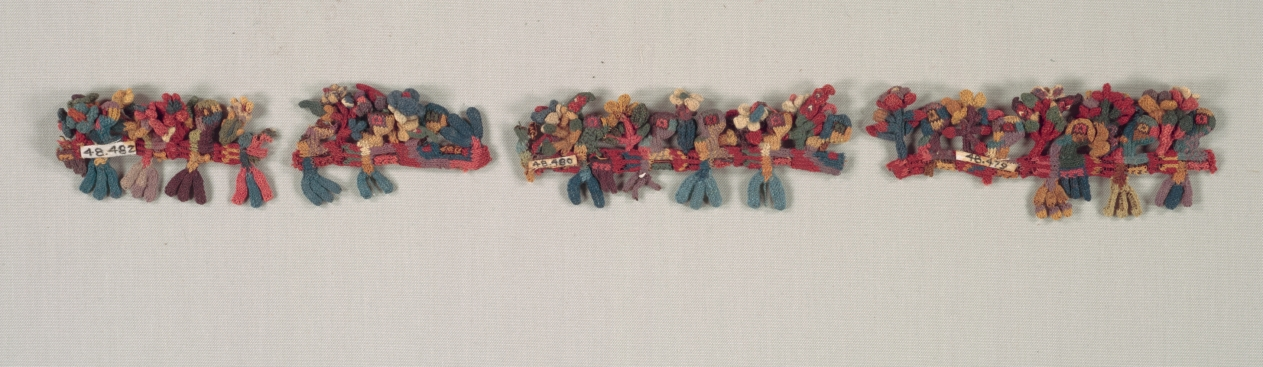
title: Border Fragment with Birds and Flowers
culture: Peru, South Coast, Nasca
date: 100 BCE–700 CE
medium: camelid fiber, cross-knit looping (reversible)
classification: Embroidery